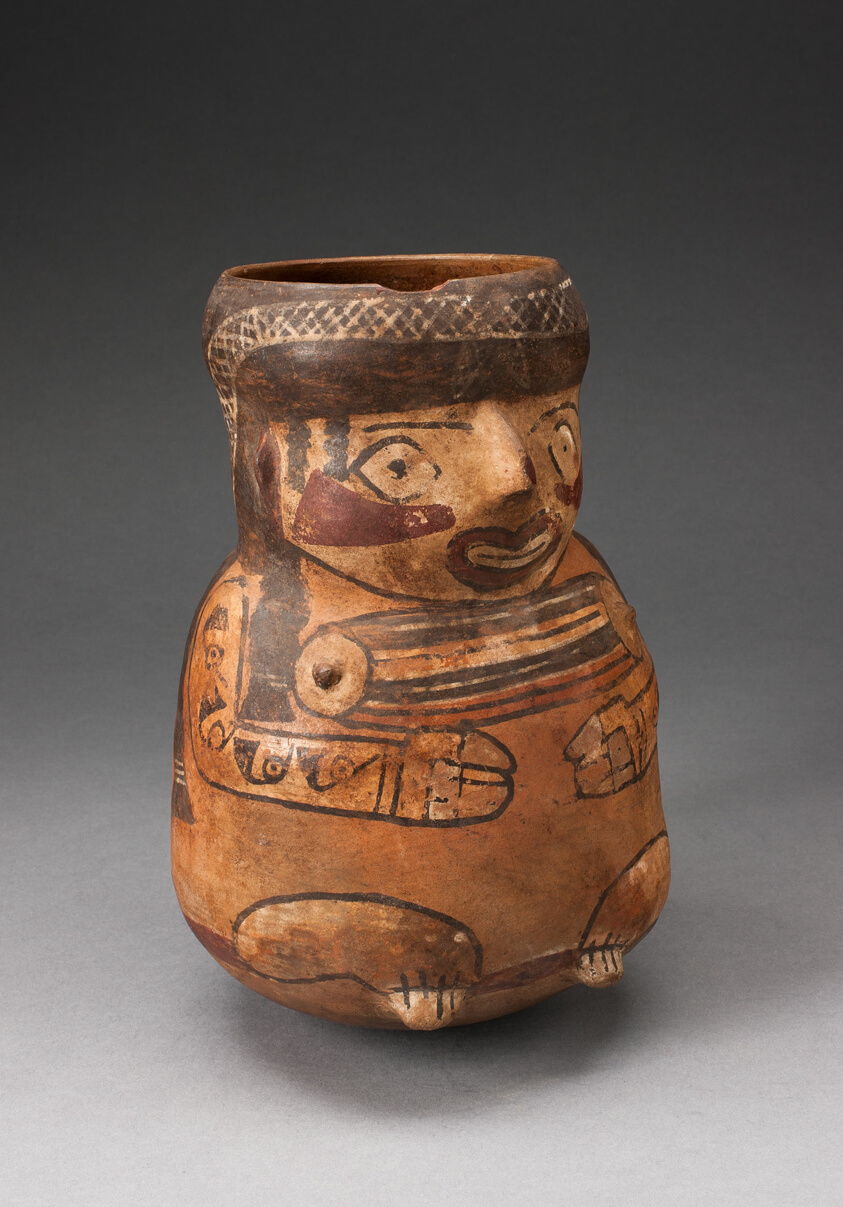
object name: Vessel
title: Beaker in the Form of a Seated Female with Tatoos and Body Paint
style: nazca, early intermediate period, Pre-Columbian, americas, Arts of the Americas, andean, andes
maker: Nazca; South coast, Peru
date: 180 BCE–500 CE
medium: Ceramic and pigment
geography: Peru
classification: earthenware; art of the americas; ceramics; vessel